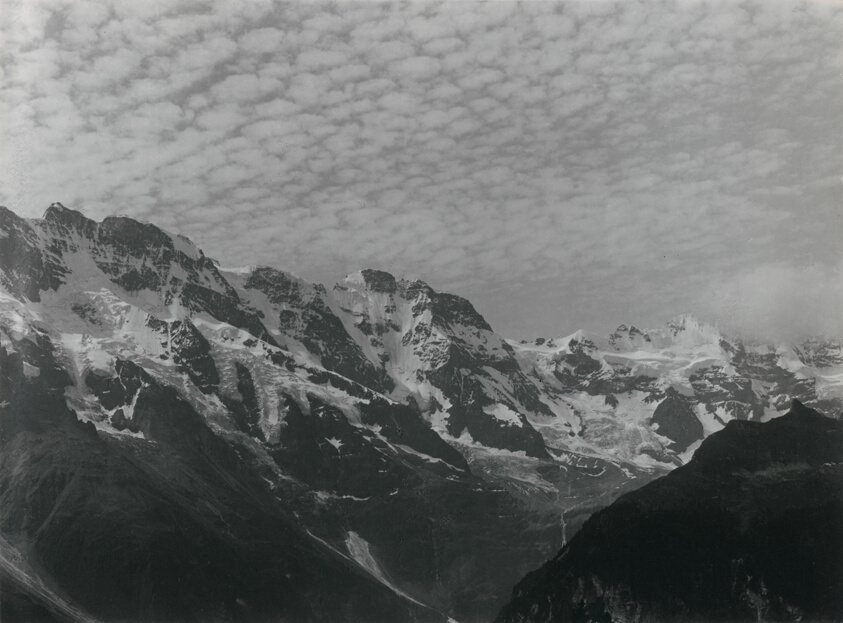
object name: Photograph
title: Mid Snow and Ice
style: 19th century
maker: Alfred Stieglitz (American, 1864–1946)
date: 1894, printed 1920/39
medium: Gelatin silver print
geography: United States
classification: gelatin silver (developing-out-paper) pr; photographic process; photography; photograph